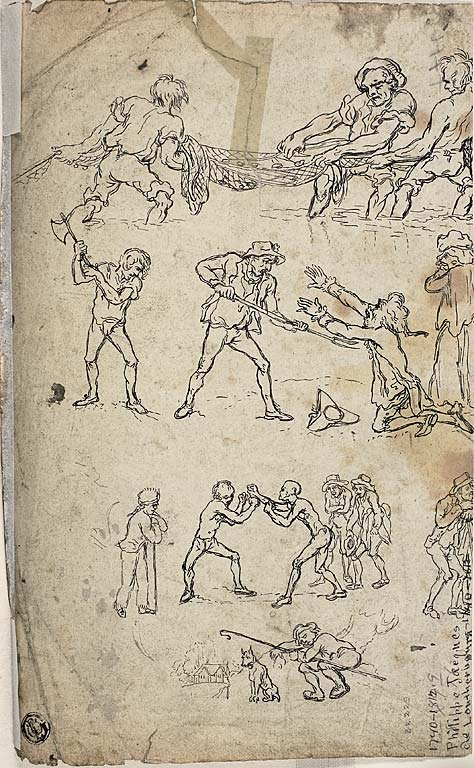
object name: Drawing and Watercolor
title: Hauling Logs in a Forest (recto); Sketches of People in Various Activities (verso)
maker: Philip Jacques de Loutherbourg; French, 1740-1812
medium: Pen and black ink, with touches of brush and gray wash, on tan wove paper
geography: France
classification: pen and ink drawings; drawings (visual works); prints and drawing